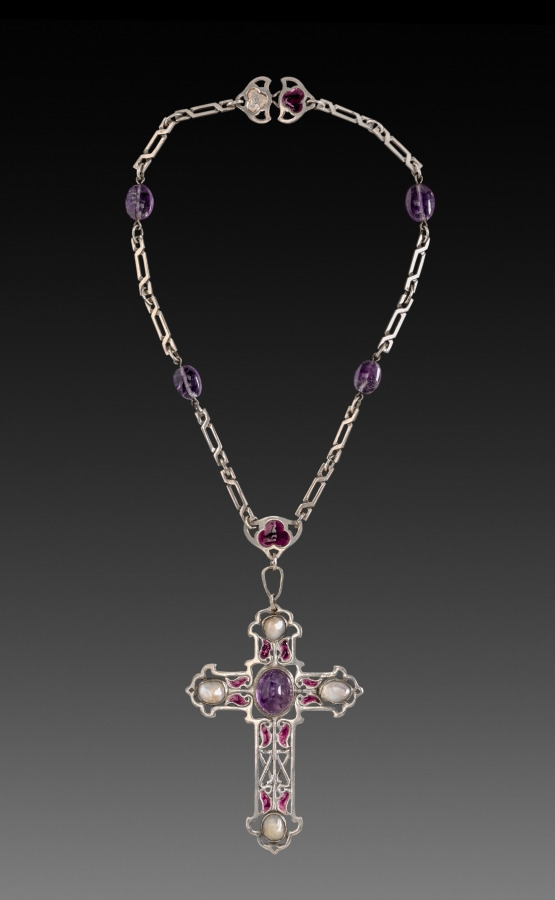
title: Cross Pendant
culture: America, Ohio, Cleveland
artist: Frances Barnum (American)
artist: Jane Carson (American, 1879–1942)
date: c. 1905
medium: silver, enamel, amethyst, pearls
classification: Jewelry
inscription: On back of clasp: CB (the letter B enclosed by the letter C); STERLING incuse